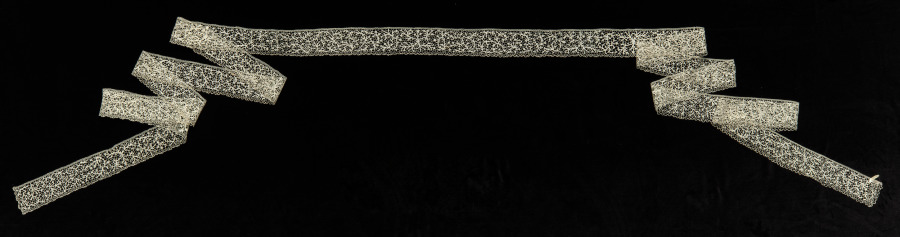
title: Lace Edging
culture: Italy, Venice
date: 1660–99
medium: Needle lace (Coralline Point)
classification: Lace